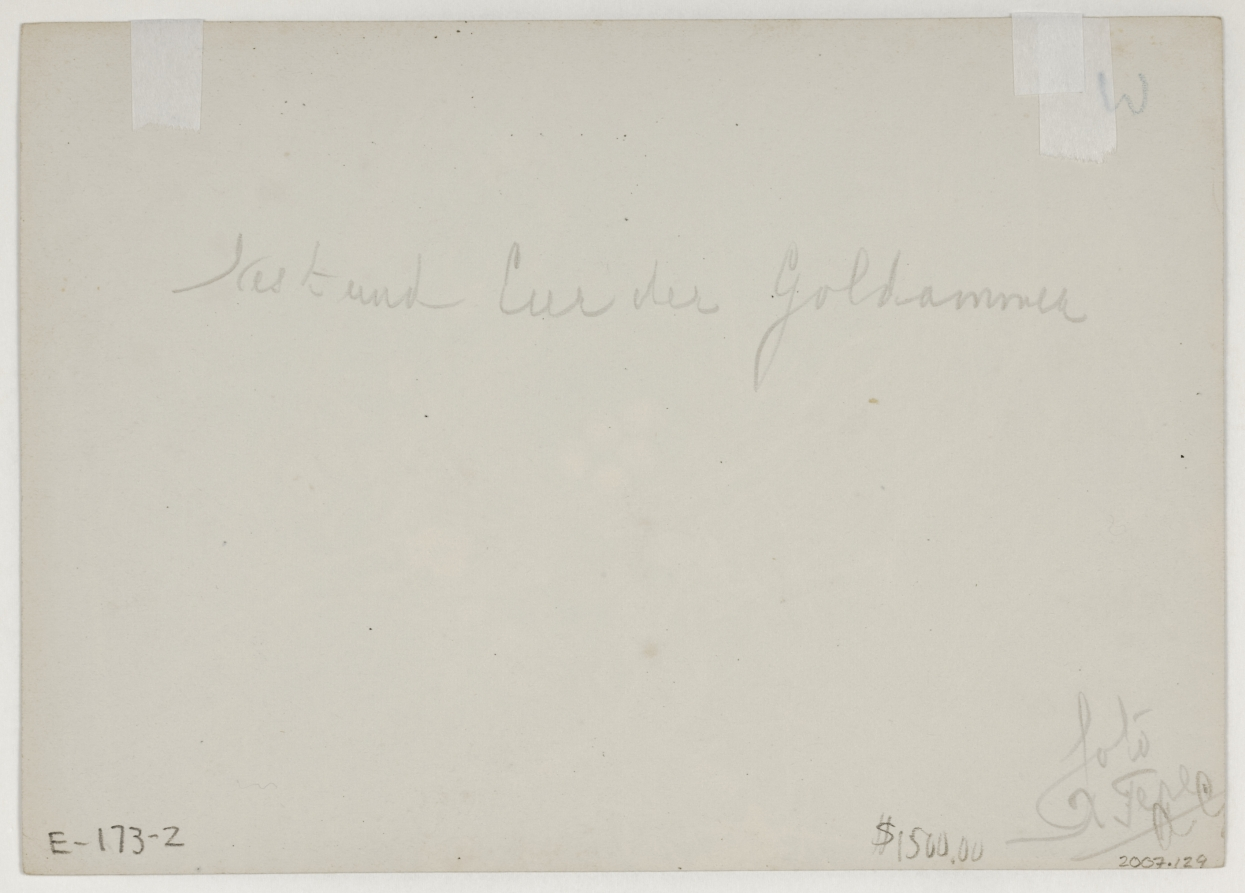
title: Yellowhammer Nest with Eggs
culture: Netherlands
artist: Richard Tepe (Netherlandish, 1864–1952)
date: 1900s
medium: gelatin silver print on printing-out paper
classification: Photograph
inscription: Written in pencil on verso: "Nest and Curder Goldammes" Written in pencil on verso: "Foto/R. Tepe (signed)"